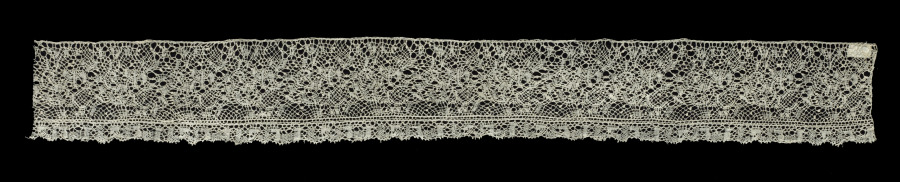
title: Lace Edging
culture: Belgium, Binche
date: 1800s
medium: Linen: bobbin lace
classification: Lace